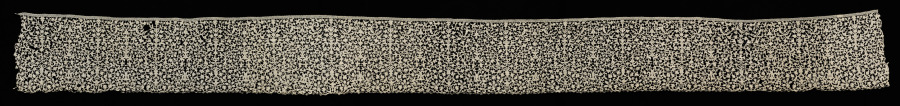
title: Lace Flounce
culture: Italy, Venice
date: 1660–99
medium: Needle lace (Venetian Rose Point-Punto Rosallino)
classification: Lace